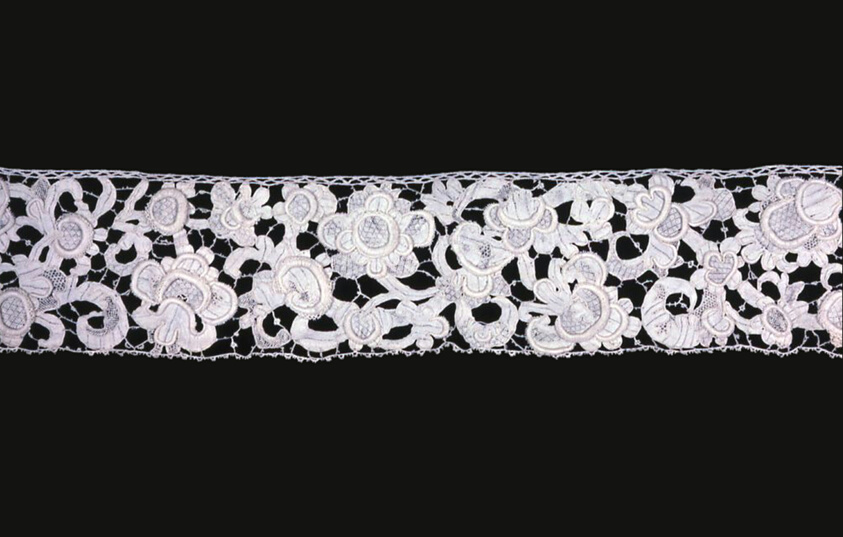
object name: Textile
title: Border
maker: Europe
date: 1650/1700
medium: Linen, raised needle lace, based on Italian, Venetian lace prototype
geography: Europe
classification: textile; lace - needle; lace